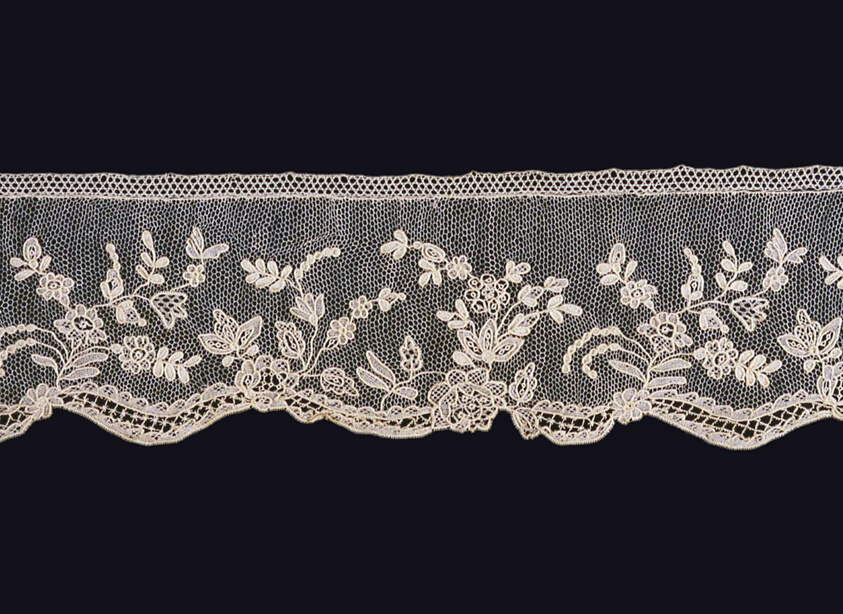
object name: Textile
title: Border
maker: France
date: 1875/1900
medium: Linen, cotton and horsehair, needle lace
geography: France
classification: textile; lace - needle